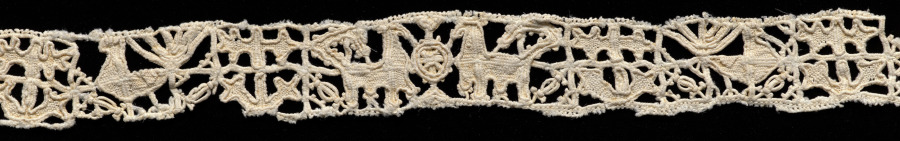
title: Lace Fragment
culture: Italy, 1600-1640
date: 1600–1640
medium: Linen: needle lace (reticella)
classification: Lace